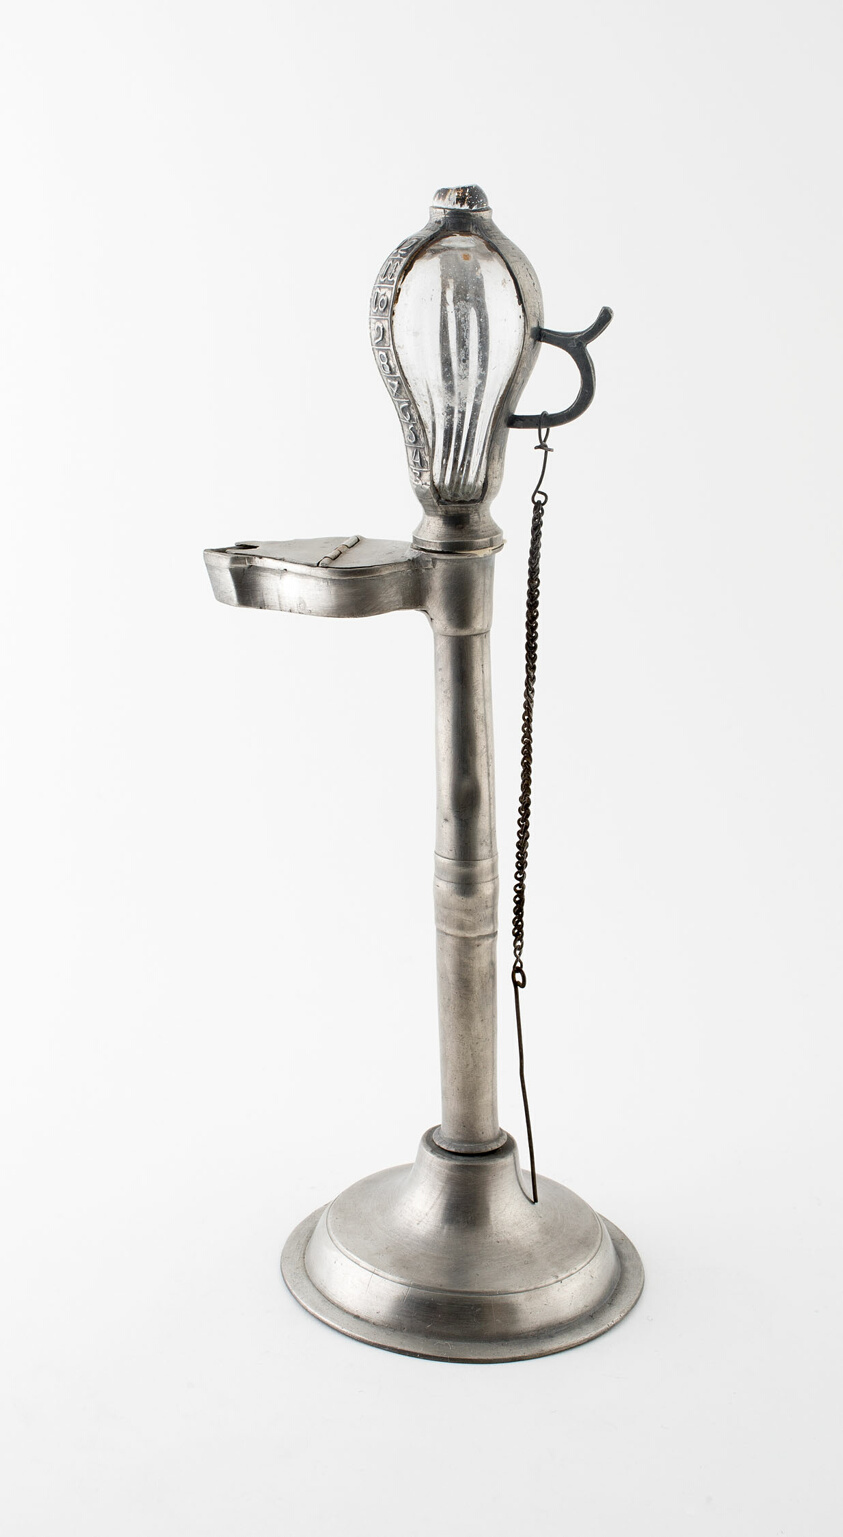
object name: Metalwork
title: Oil Lamp for Measuring Time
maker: France or Germany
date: c. 1800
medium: Pewter and glass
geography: Germany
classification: pewter; metalwork; european decorative arts